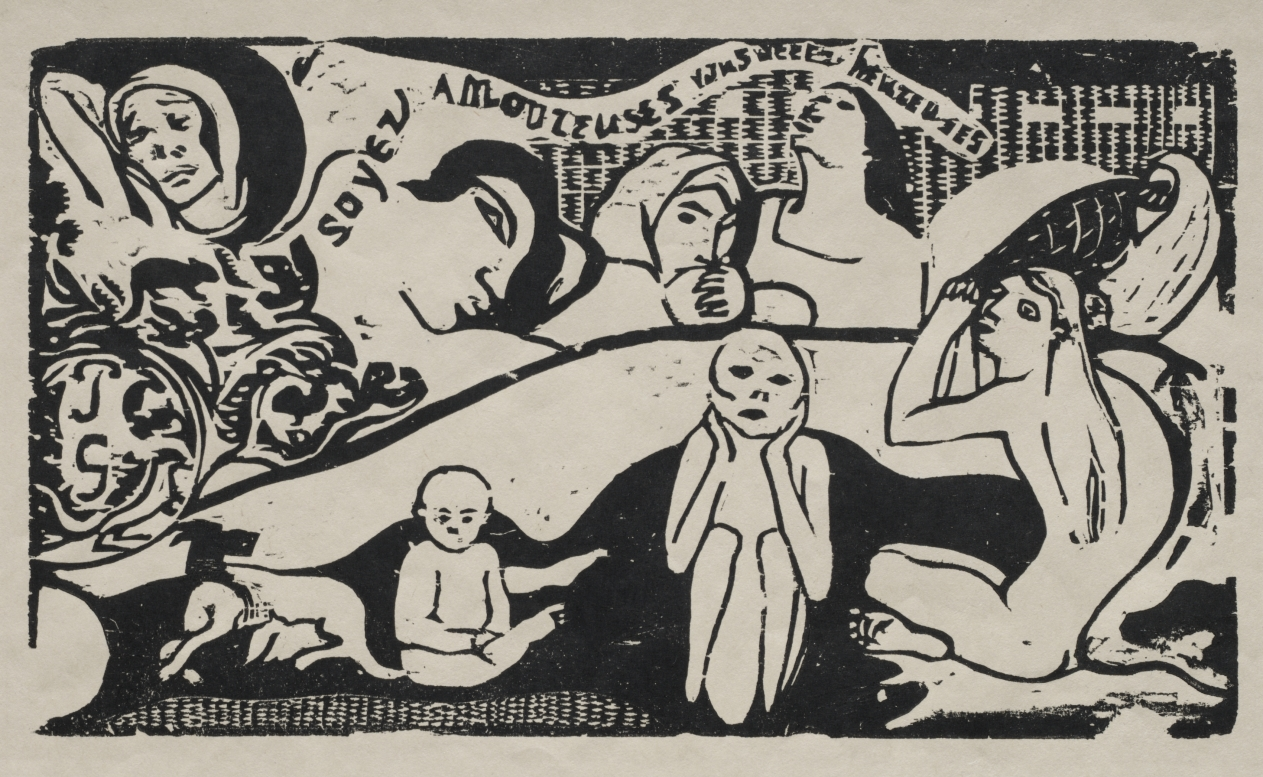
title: Be in Love and You Will Be Happy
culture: France, 19th century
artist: Paul Gauguin (French, 1848–1903)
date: c. 1898–99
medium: woodcut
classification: Print